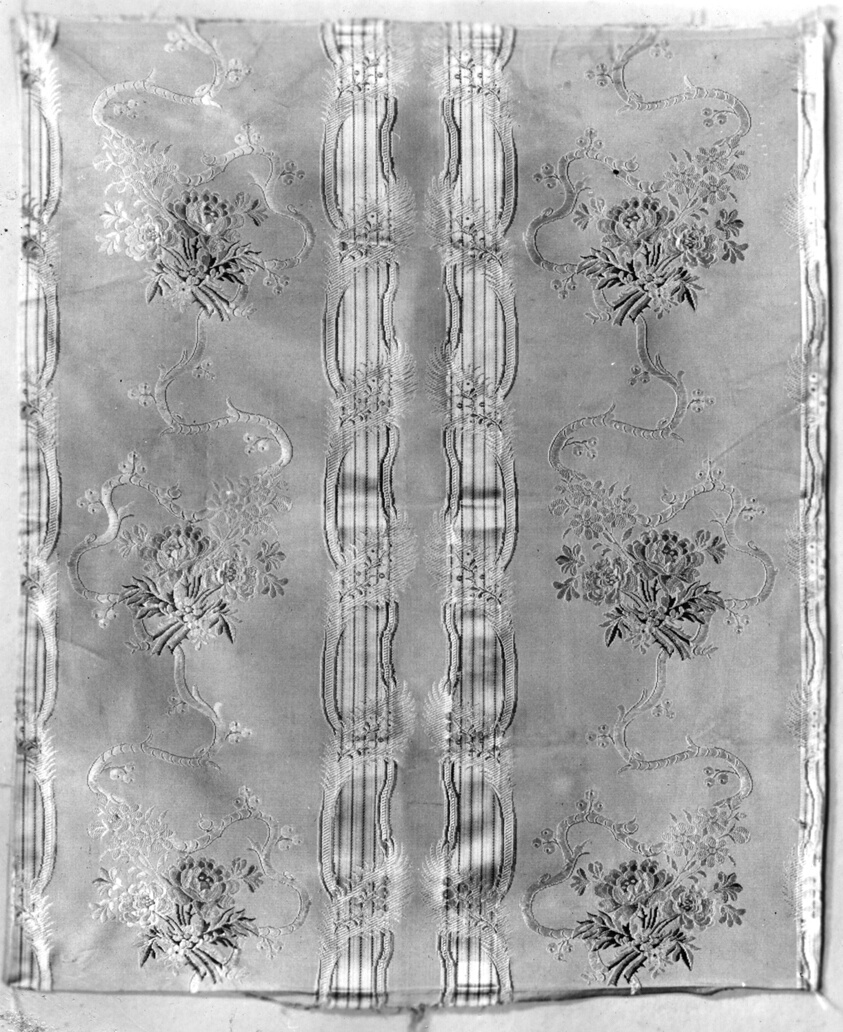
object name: Textile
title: Panel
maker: France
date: 1885/1900 (reproduction of 1760s pattern)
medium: Silk, warp-float faced 7:1 satin weave with supplementary brocading wefts and self-patterned by areas of plain and twill interlacing; woven on loom with Jacquard attachment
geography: France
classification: textile; weaving